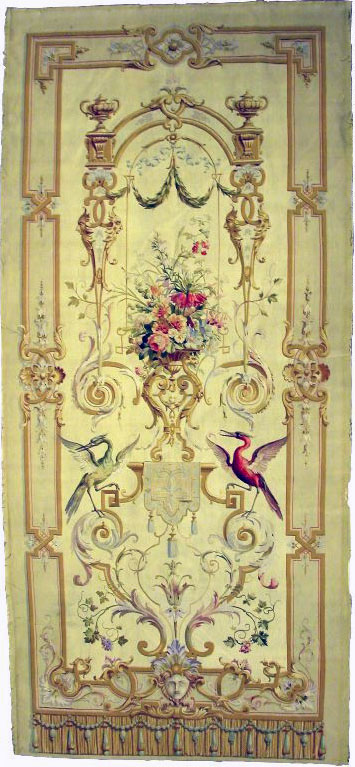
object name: Textile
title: Hanging Portière or Panel for a Bed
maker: Possibily Designed by Gobelins Factory or René Beauvais; France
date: 1775/1825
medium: Cotton, wool, and silk, slit and double interlocking tapestry weave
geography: France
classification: weaving - tapestry; textile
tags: birds, animals, columns, flowers, Greek, mythology, swags, urns